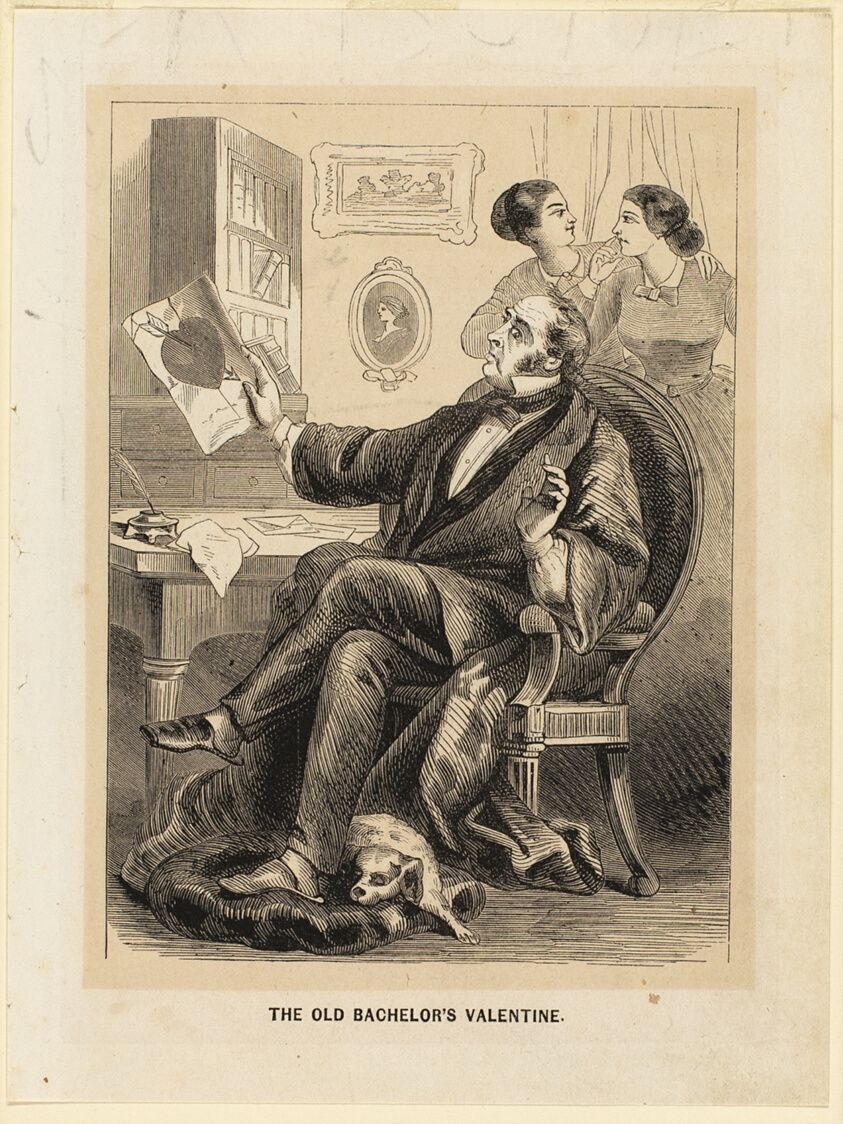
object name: Print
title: The Old Bachelor's Valentine (valentine)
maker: Unknown Artist; English, 19th century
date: 1860/70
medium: Wood engraving on ivory paper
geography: England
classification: collage; valentine; prints and drawing; print